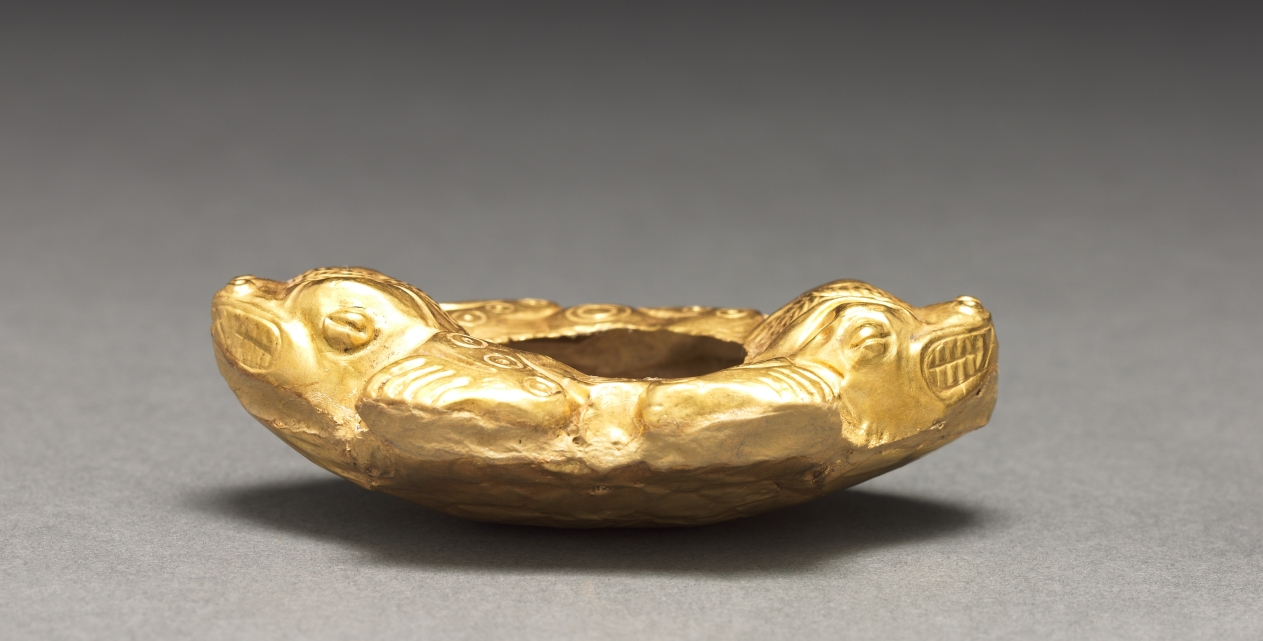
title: Double Crocodile Vessel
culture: Central Panama, (Sitio Conte?), Conte Style, 5th-10th Century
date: c. 400–900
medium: hammered and embossed gold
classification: Metalwork